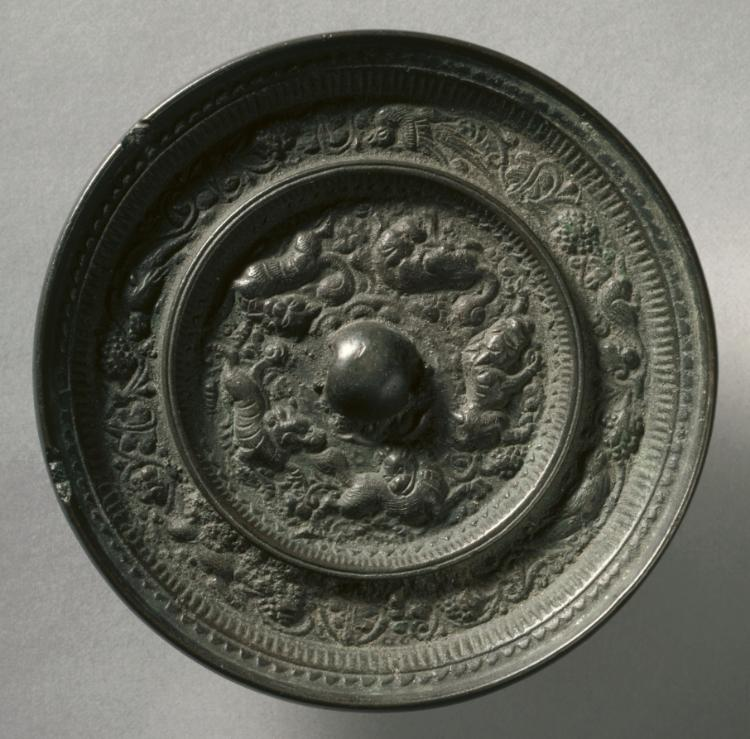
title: Animal-and-Grape Mirror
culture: China, Jin dynasty (1115-1234)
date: early 1100s–mid-1200s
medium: bronze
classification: Metalwork